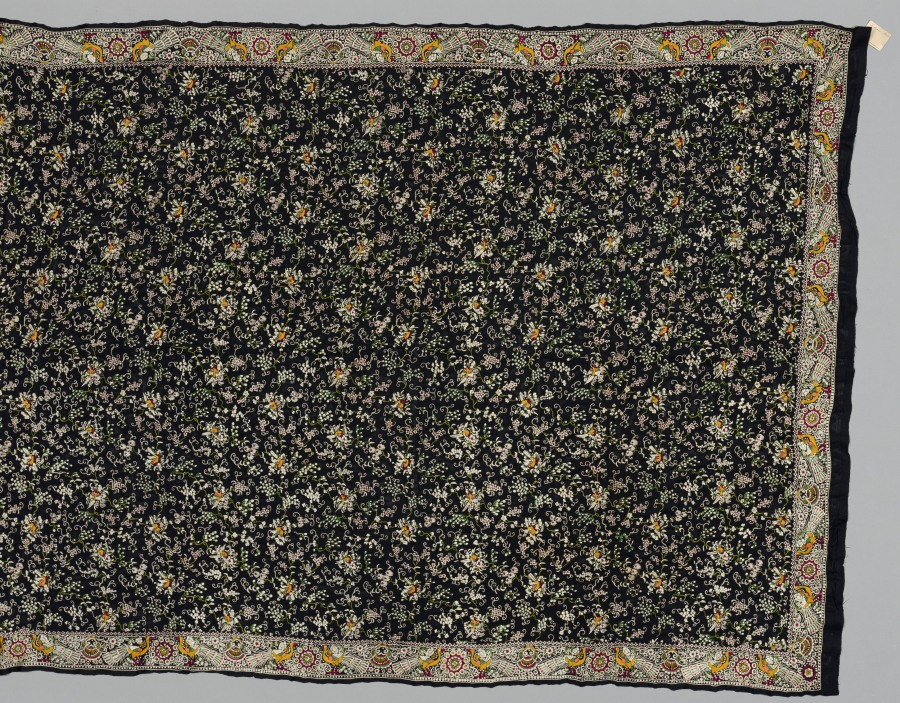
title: Shawl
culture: China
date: early 1900s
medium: embroidery, silk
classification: Embroidery